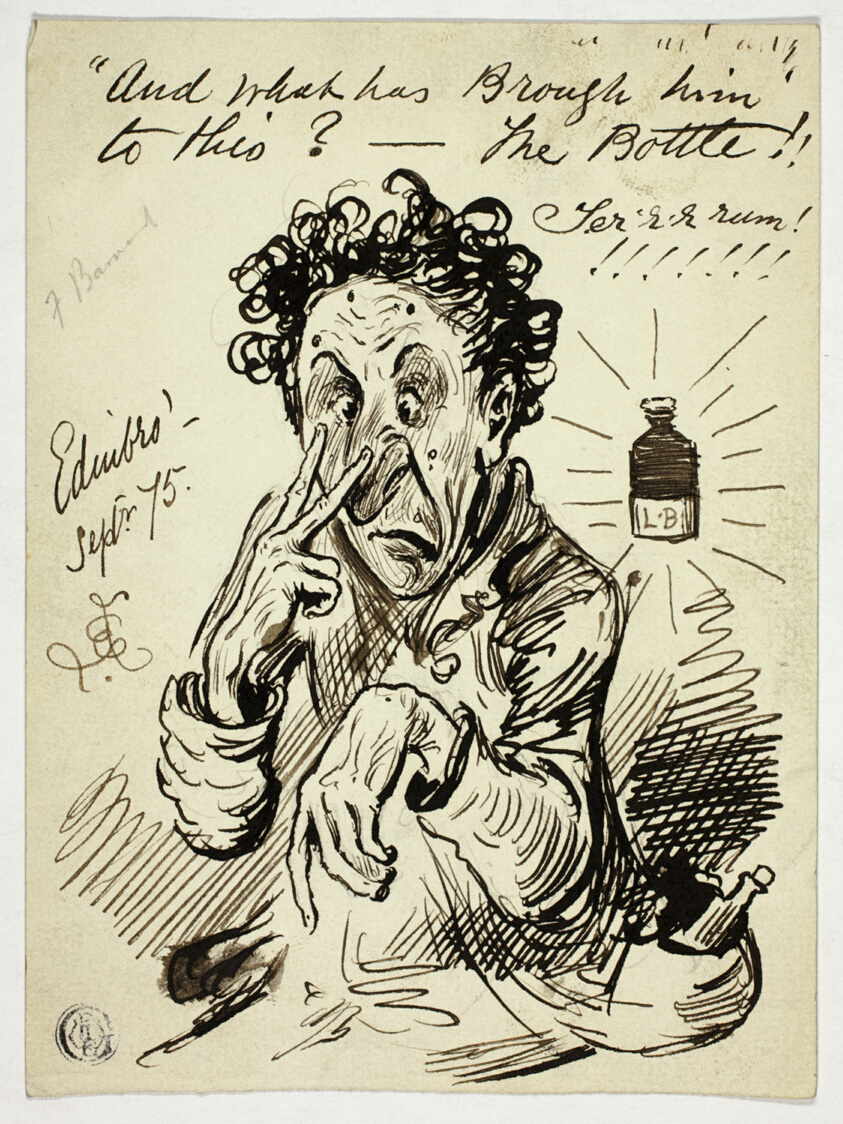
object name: Drawing and Watercolor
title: And What has Brought [sic] Him to This?-The Bottle!!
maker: Frederick Barnard (English, 1846-1896)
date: 1875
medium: Pen and brown ink, over graphite, on ivory wove paper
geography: England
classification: pen and ink drawings; paper; drawings (visual works); prints and drawing